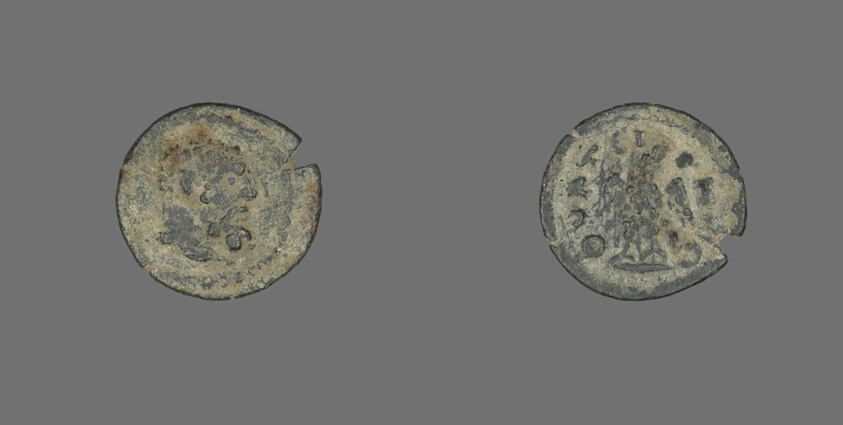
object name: Coin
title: Coin Depicting the Hero Hercules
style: roman (ancient, style or period)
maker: Roman; Thyatira, Lydia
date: 211-222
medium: Bronze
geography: Roman Empire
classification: coin; ancient art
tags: Heracles, gods (deities)